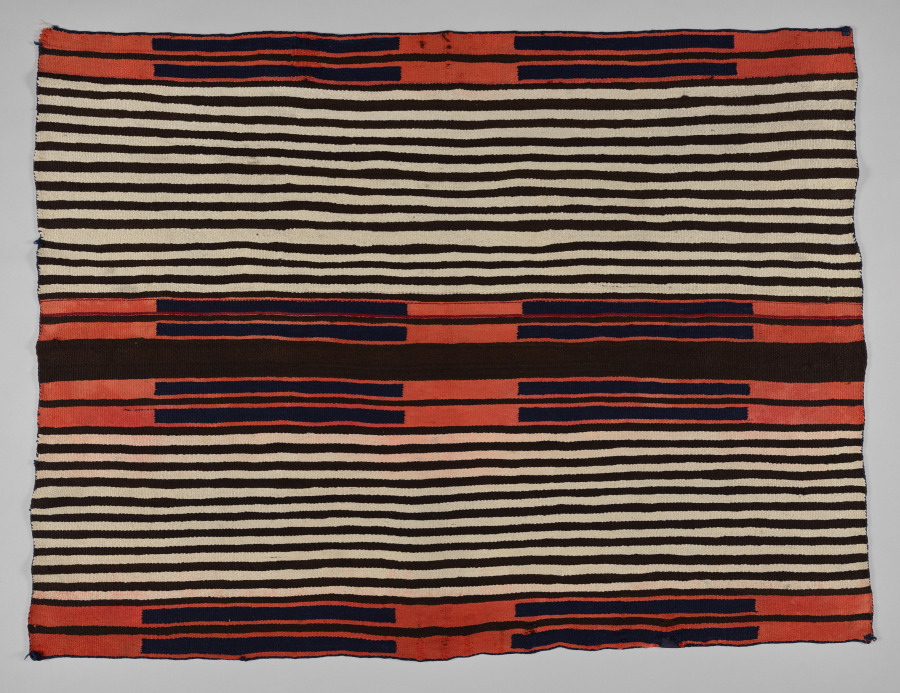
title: Wearing Blanket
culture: America, Native North American, Southwest, Navajo (Dine), female artist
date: c. 1875–80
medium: Wool (handspun, Germantown, and bayeta): tapestry weave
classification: Textile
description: Diné (Navajo) artists wove geometric designs that reference the natural environment as well as embody spiritual insights and meanings. Specific patterns were inherited but also evolved over time. This blanket was created during the late 1800s, when weavers in the Southwest began to shift from making garments for Indigenous use, including trade, to additionally create items for non-Native collectors. In this new market, traditional wearing blankets, which were worn around the shoulders, were purchased as rugs.